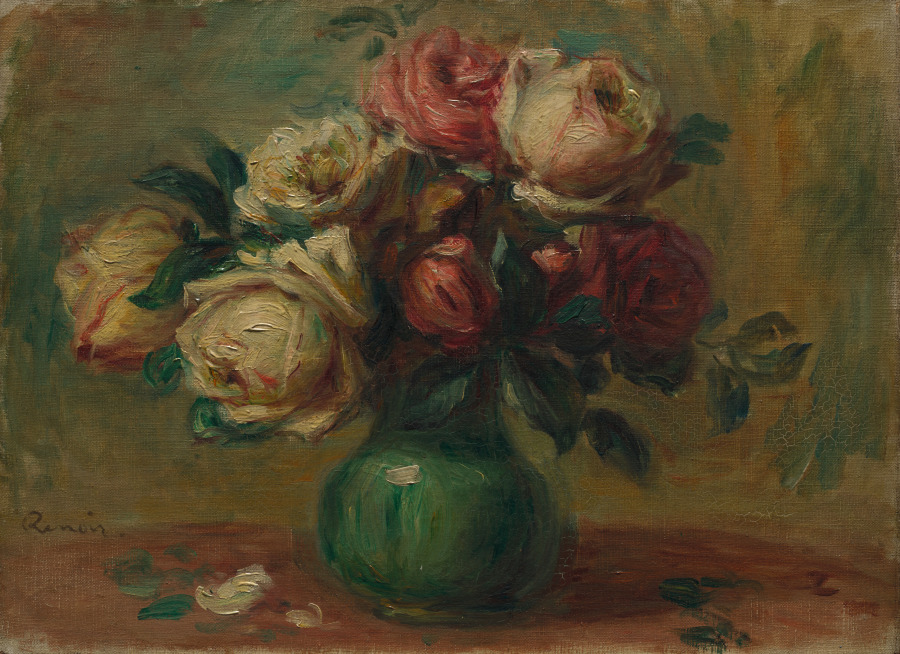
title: Roses in a Vase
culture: France, 19th century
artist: Pierre-Auguste Renoir (French, 1841–1919)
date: c. 1890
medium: oil on fabric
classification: Painting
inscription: Signed lower left: Renoir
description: The palette Renoir used to depict the seven roses in this still life ranges from various shades of red to warm whites, light yellows, and pinks. The artist declared, "'Painting flowers lets my brain rest. It does not cause the same tension of spirit as when I face a model. When I paint flowers, I put down tones, I boldly try values, without having to worry about losing a canvas.'" He was particularly fond of roses, whose full, rounded shapes he likened to the female body. In 1861, Renoir met Claude Monet (1840–1926) and later shared a studio with him. Monet became an important influence on Renoir's art, as can be seen here in the rapid brush strokes, thinly scuffled background, and buildup of paint (impasto) in the blooms.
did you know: Renoir was an excellent singer who wanted to be a musician, but for financial reasons left school at age thirteen to work as an apprentice painter in a porcelain factory.